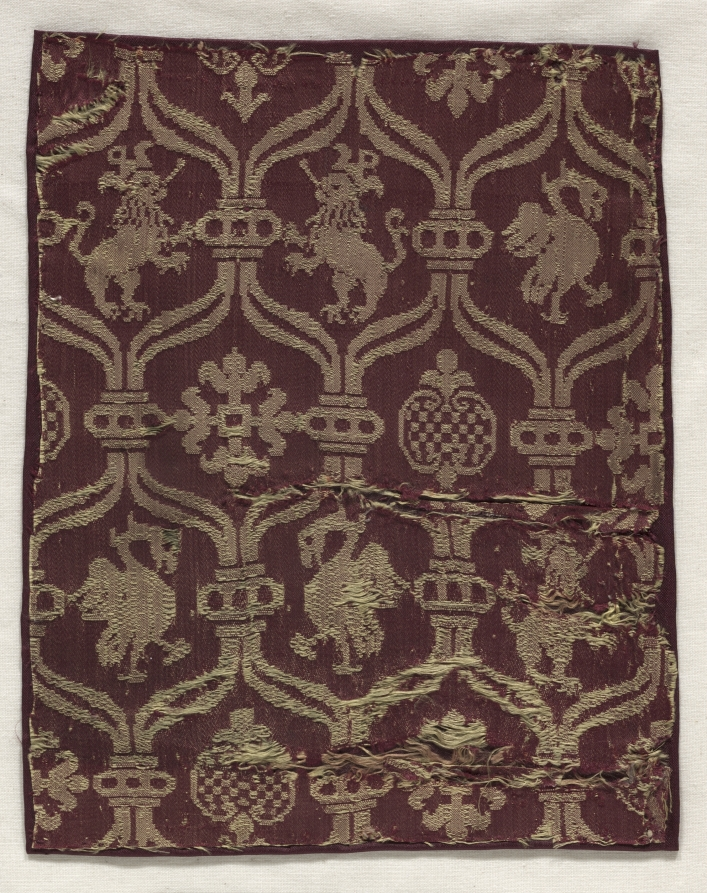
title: Fragment of Silk Damask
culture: Spain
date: 1500s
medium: silk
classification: Textile